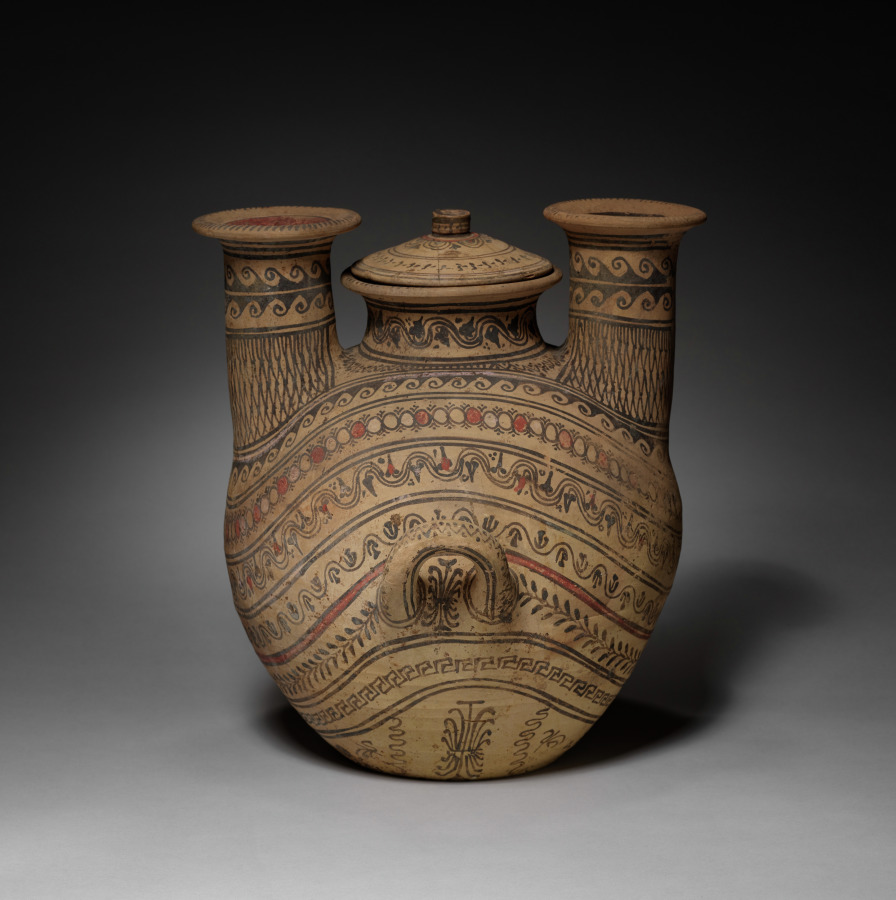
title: Two-Spouted Strainer Askos (Flask) with Lid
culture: South Italian, Daunian or Canosan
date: 300–200 BCE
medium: ceramic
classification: Ceramic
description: Although now referred to by the Greek term askos, because of its resemblance to the animal skins used to hold wine in ancient Greece, this ceramic shape developed in the South Italian region of Daunia (north of Apulia, on the Adriatic coast). This example is unusual for its three openings—one covered by a lid, the others spouted with built-in strainers. Its profusely painted decoration, mostly geometric and vegetal patterns applied in black with added red and white, is arranged in bands that follow the contours of the vessel.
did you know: Each spout has a built-in strainer—one near the top, the other near the bottom.